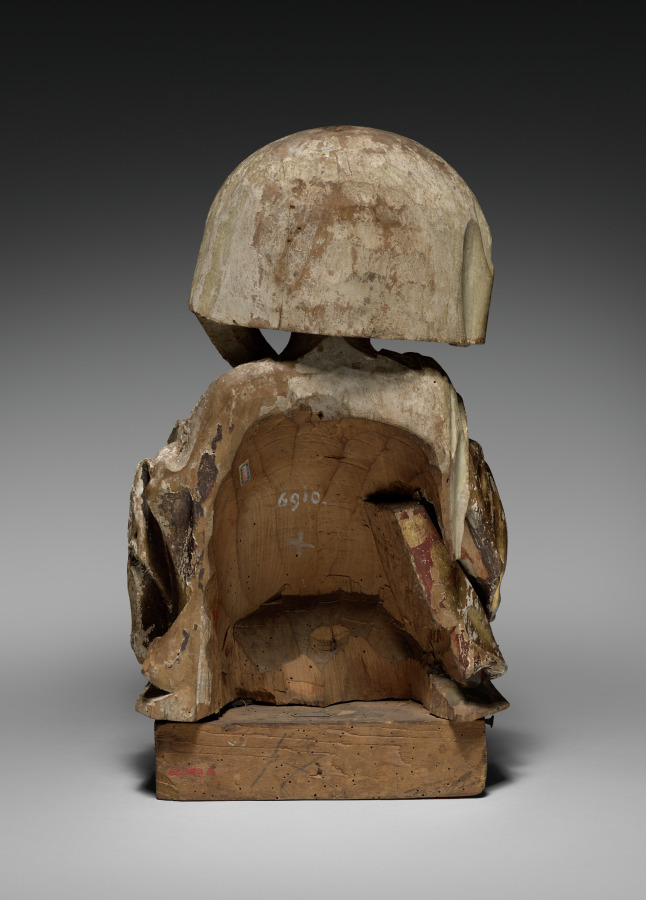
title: Female Bust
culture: Austria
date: c. 1470–1500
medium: Painted and gilded lindenwood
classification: Sculpture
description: This female bust is part of a series of three in the museum's collection. The identity of the figures has been speculated by scholars but without resolution. Because this and the other female busts in the series do not retain their attributes, it is difficult to know their original purpose. It is possible that they may have once formed a group of female saints from the predella of a large altarpiece. Since the sculpture is not carved in the round, this hypothesis has merit. Another recent proposal is that this and the other sculptures may be from a series of female busts representing the wise and foolish virgins referenced in Matthew 25:1-13, a parable by Jesus admonishing listeners to be spiritually prepared.